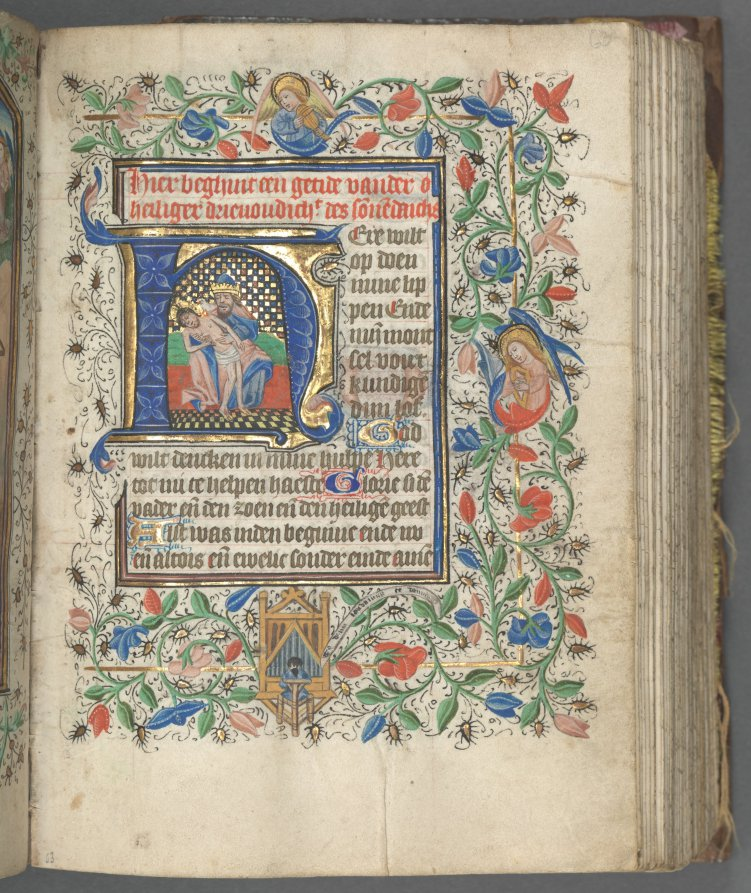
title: Book of Hours (Use of Utrecht): fol. 63r, Initial with Holy Trinity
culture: Netherlands, Utrecht, 15th century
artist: Master of Gijsbrecht van Brederode (Netherlandish)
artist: and Master of the Boston City of God (Netherlandish)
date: c. 1460–1465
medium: ink, tempera, and gold on vellum; binding: brown Morocco over original wooden boards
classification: Bound Volume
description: This manuscript is a collaborative effort of two talented illuminators with distinctive styles. Ninety-seven historiated initials (letters containing scenes), including the one on recto (right side) shown here, are by the Master of the Boston City of God, a painter who worked in Utrecht. Four full-page miniatures (small paintings), including the Nativity on the verso (left side), have recently been attributed to the Master of Gijsbrecht van Brederode. The background of the Nativity depicts a distant cityscape (perhaps Utrecht), adjacent to which may be seen the Journey of the Magi and the Annunciation to the Shepherds. In the left margin, the Virgin Mary (above) appears to the Roman Emperor Augustus and the Tiburtine Sibyl, who, according to legend, foretold the coming of Christ. This volume is not written in Latin, but in a Dutch littera textualis, an elegant Gothic bookhand.